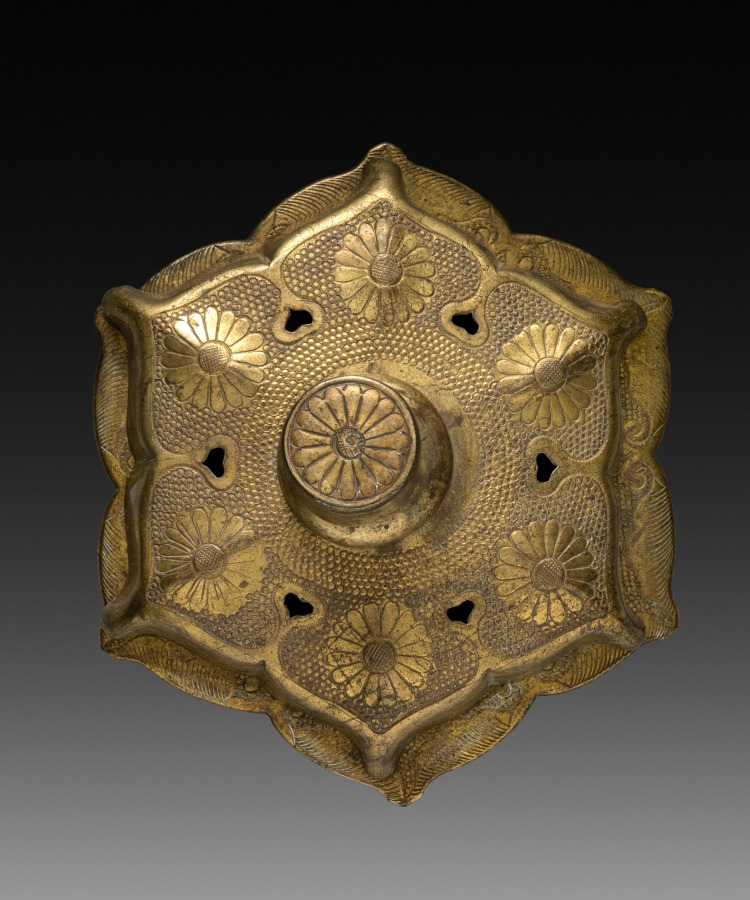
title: Gilt Nail Head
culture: Japan, Edo period (1615–1868)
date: early to mid-1800s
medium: gilt bronze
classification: Metalwork